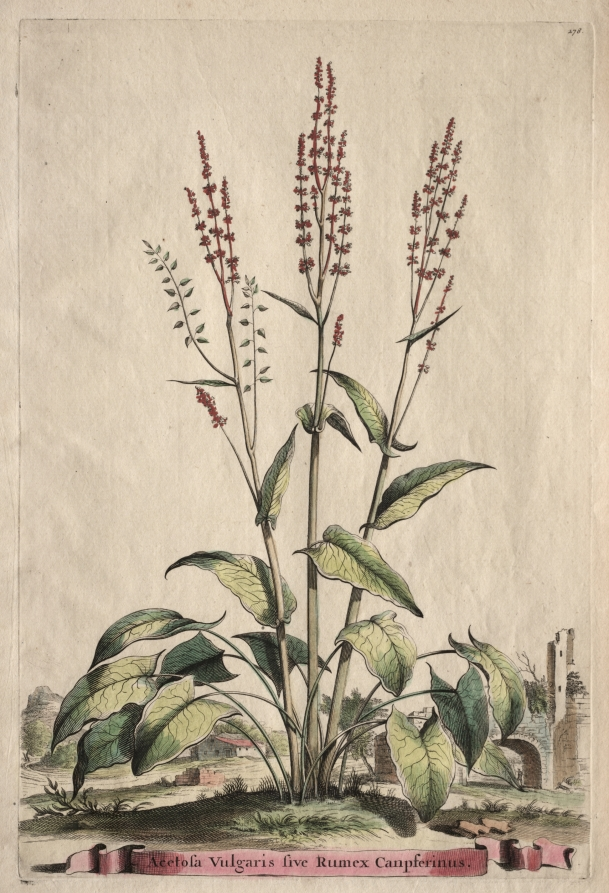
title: Phytographia Curiosa: Acetosa Vulgaris sive Rumex Canpferinus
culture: Netherlands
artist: Abraham Munting (Dutch, 1626–1683)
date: 1651–83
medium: etching, hand colored with watercolor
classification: Print